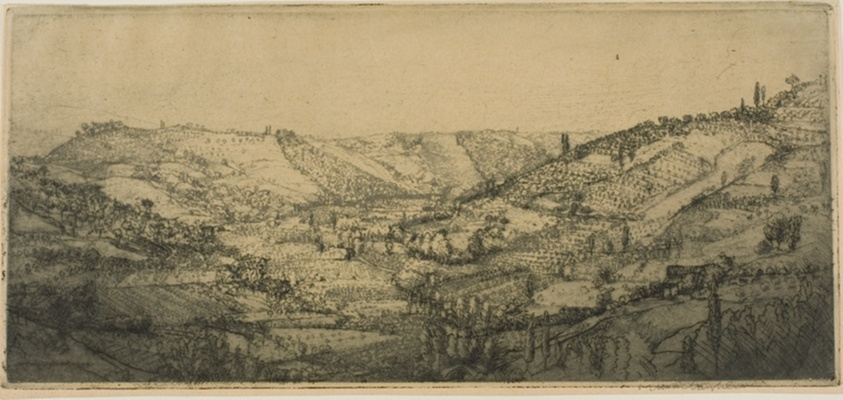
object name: Print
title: Val d'Ema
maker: Donald Shaw MacLaughlan (American, 1876-1938)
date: 1909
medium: Etching in black on buff wove paper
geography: United States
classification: etching; print; prints and drawing